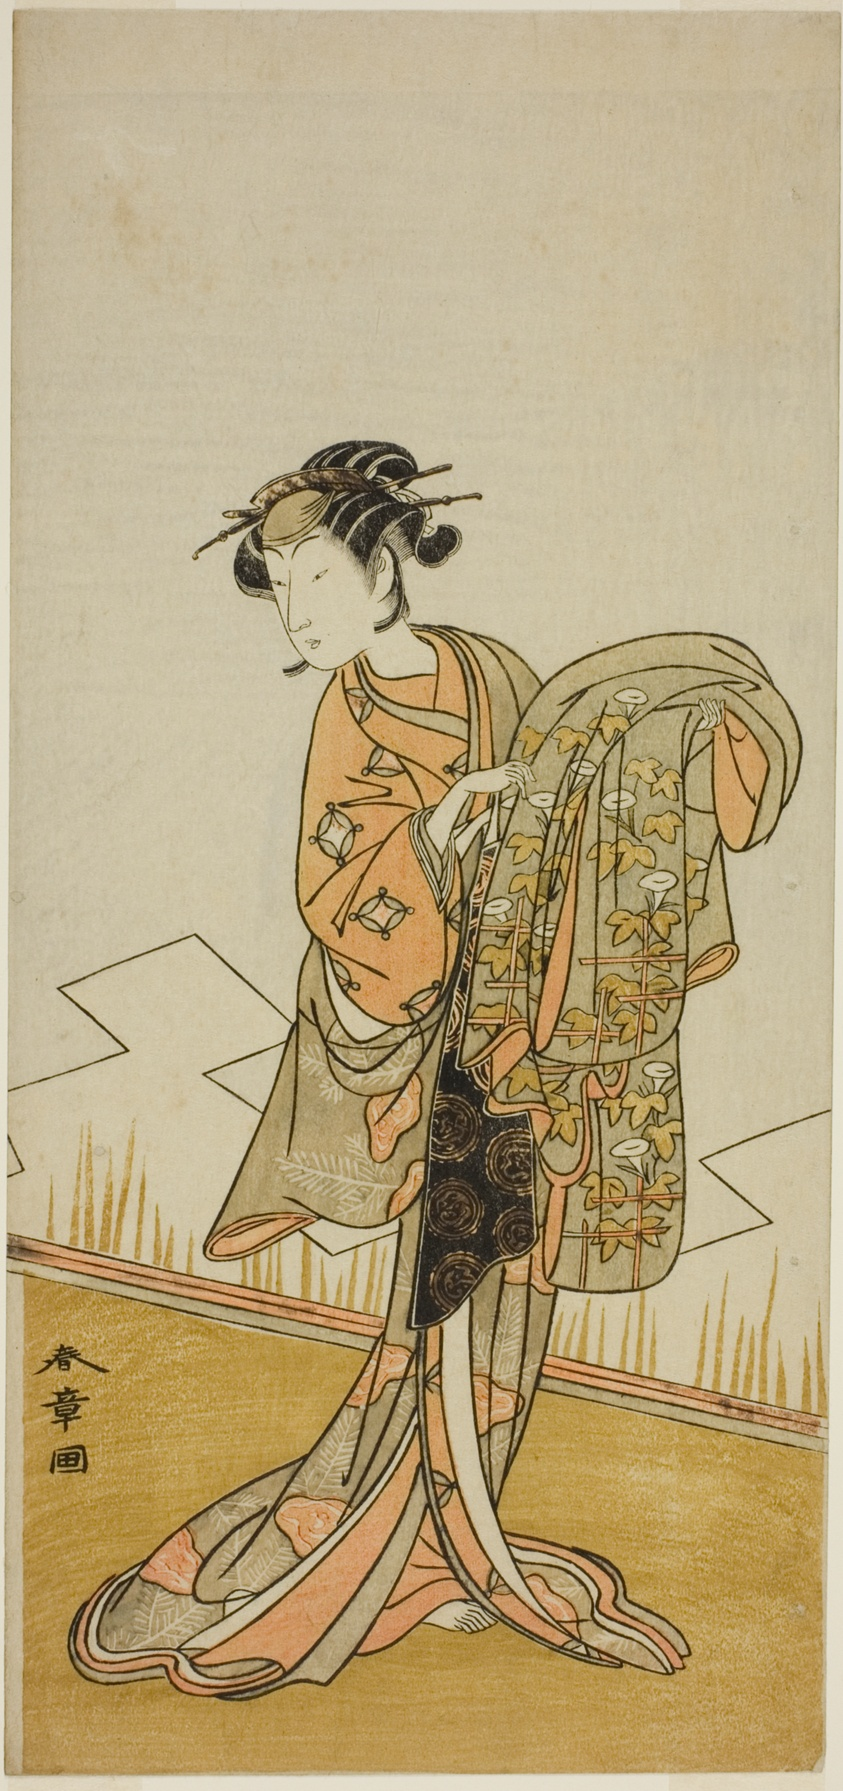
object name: Print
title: The Actor Nakamura Riko I as the Courtesan Wakamatsu (?) in the Play Gohiiki Kanjincho (?), Performed at the Nakamura Theater (?) in the Eleventh Month, 1773 (?)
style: Japanese (culture or style)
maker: Katsukawa Shunsho 勝川 春章; Japanese, 1726-1792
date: c. 1773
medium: Color woodblock print; hosoban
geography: Japan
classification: woodblock print; print; asian art